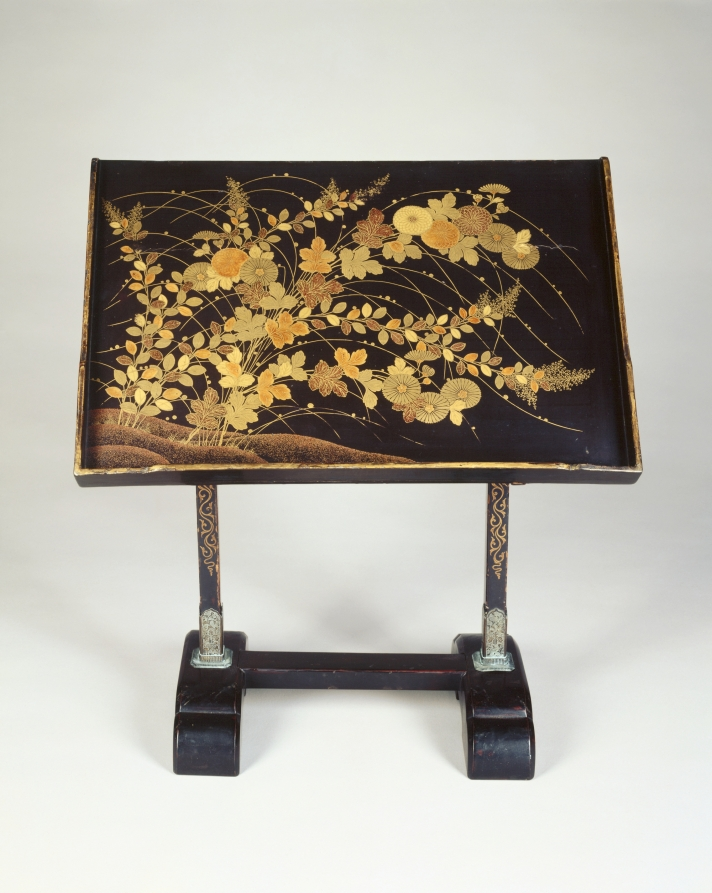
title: Reading Stand with Chrysanthemums and Autumn Grasses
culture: Japan, Momoyama period (1573–1615)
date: early 1600s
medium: Wood with lacquer, sprinkled gold powder (maki-e), and metal fittings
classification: Lacquer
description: Japanese reading stands often incorporate motifs associated with seasonal poetry. The combination of long, narrow, miscanthus grass, bush clover with its small, ovoid leaves, and chrysanthemum with its many-petaled blossoms is classic autumnal imagery. One lacquer technique featured prominently on the stand is sprinkled gold in low relief (hiramaki-e). Pear-skin ground design (nashiji-e) is used for the slopes of the ground and in some of the leaves.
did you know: Dew on chrysanthemum is seasonal imagery symbolizing the approach of winter.